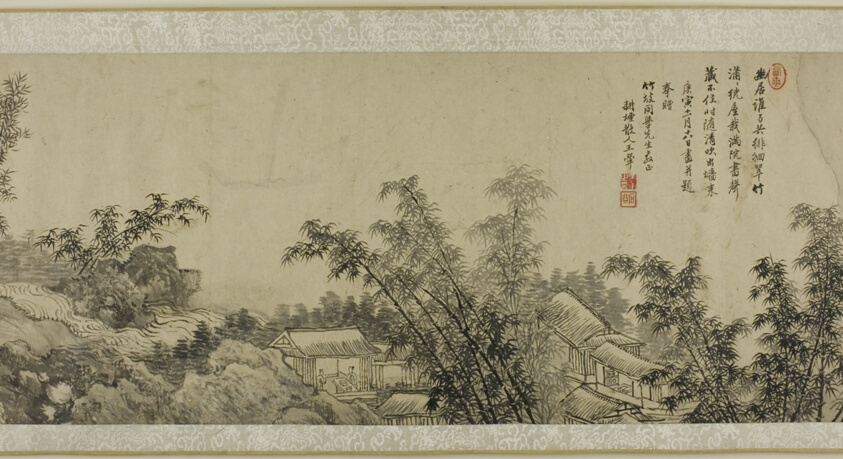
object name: Painting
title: The Bamboo Slope 竹坡圖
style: Chinese (culture or style)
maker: Wang Hui 王翚 (1632-1717); Chinese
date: Qing dynasty (1644–1912), 1710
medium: Handscroll; ink on paper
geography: China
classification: handscroll; painting; asian art